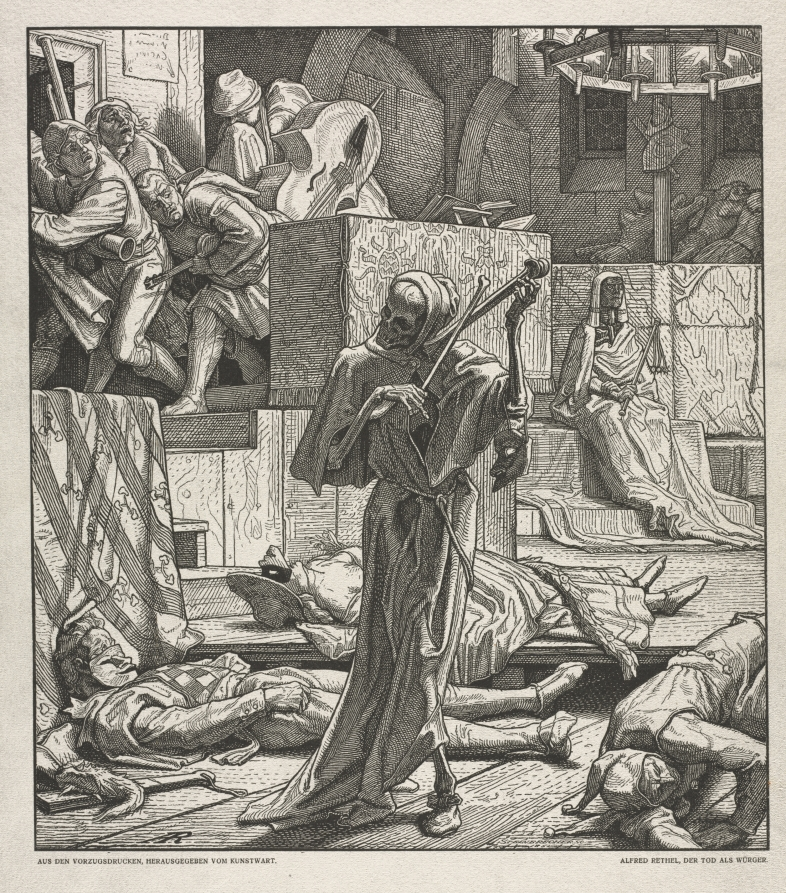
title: Dance of Death: Death the Strangler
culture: Germany, 19th century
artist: Alfred Rethel (German, 1816–1859)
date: 1850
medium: woodcut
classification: Print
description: Death the Strangler refers to an event of some twenty years earlier in Paris, as the caption explains: "The first outbreak of cholera at a masked ball in Paris in 1831." Rethel was influenced by 16th-century images of death, such as Hans Holbein's Dance of Death (on view in gallery 109). Here, the artist's interpretation of death as an overwhelmingly menacing force derives from Albrecht Dürer, whose Apocalypse: The Four Horsemen (also on view in gallery 109) depicts death as a destructive power sweeping away everything in its path.